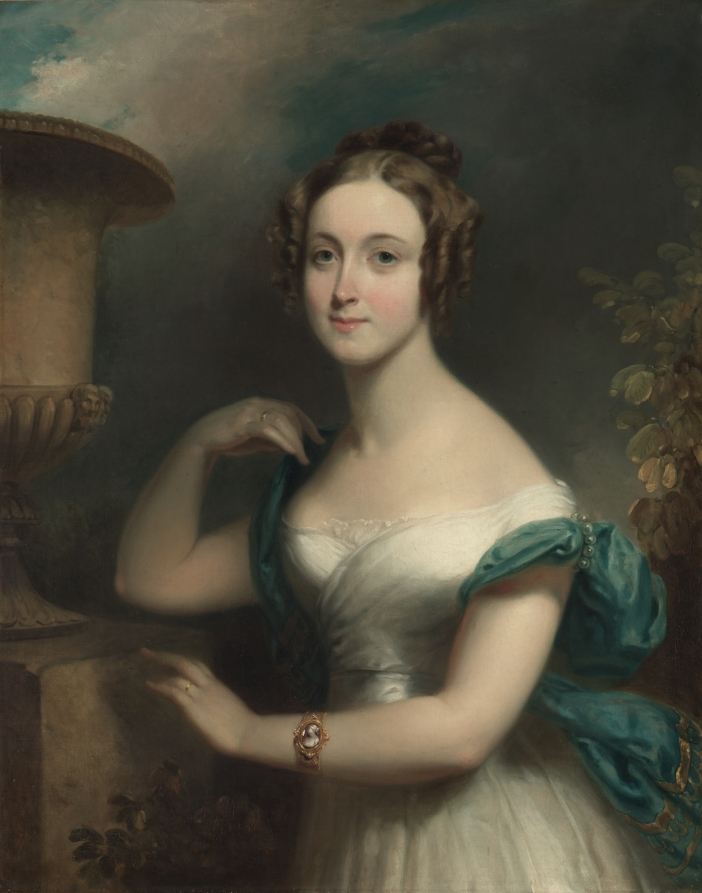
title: Mary Ward Betts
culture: America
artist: Henry Inman (American, 1801–1846)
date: 1830s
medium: oil on canvas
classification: Painting